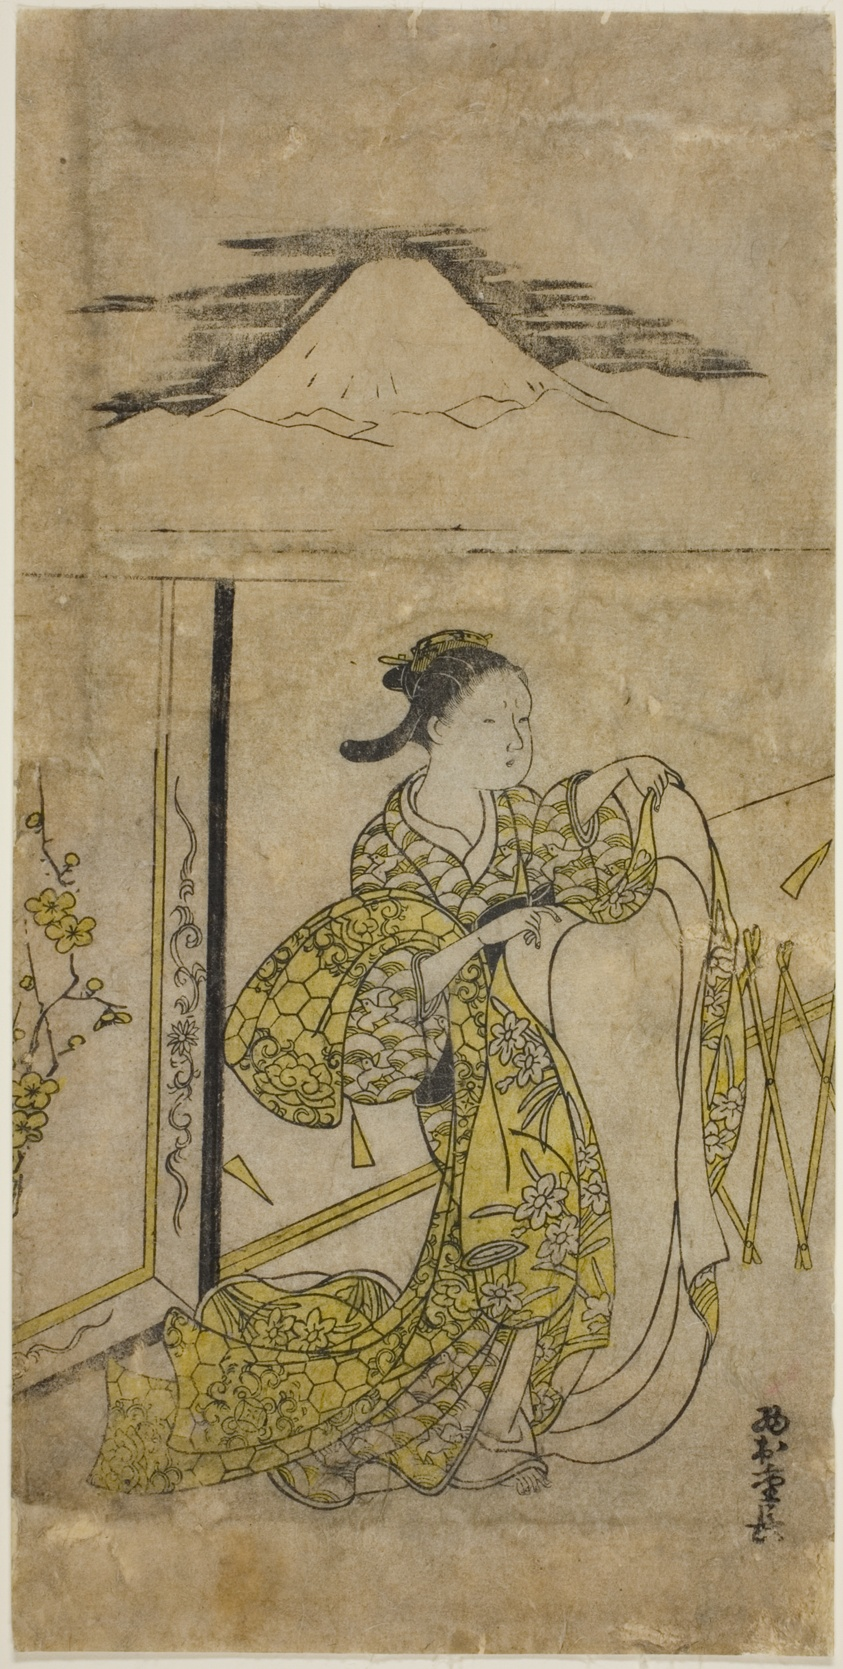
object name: Print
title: Woman Holding Kimono with Mt. Fuji above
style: Japanese (culture or style)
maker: Nishimura Shigenaga (Japanese, 1697 (?)-1756)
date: c. 1740s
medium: Hand-colored woodblock print; hosoban, sumizuri-e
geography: Japan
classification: woodblock print; print; asian art